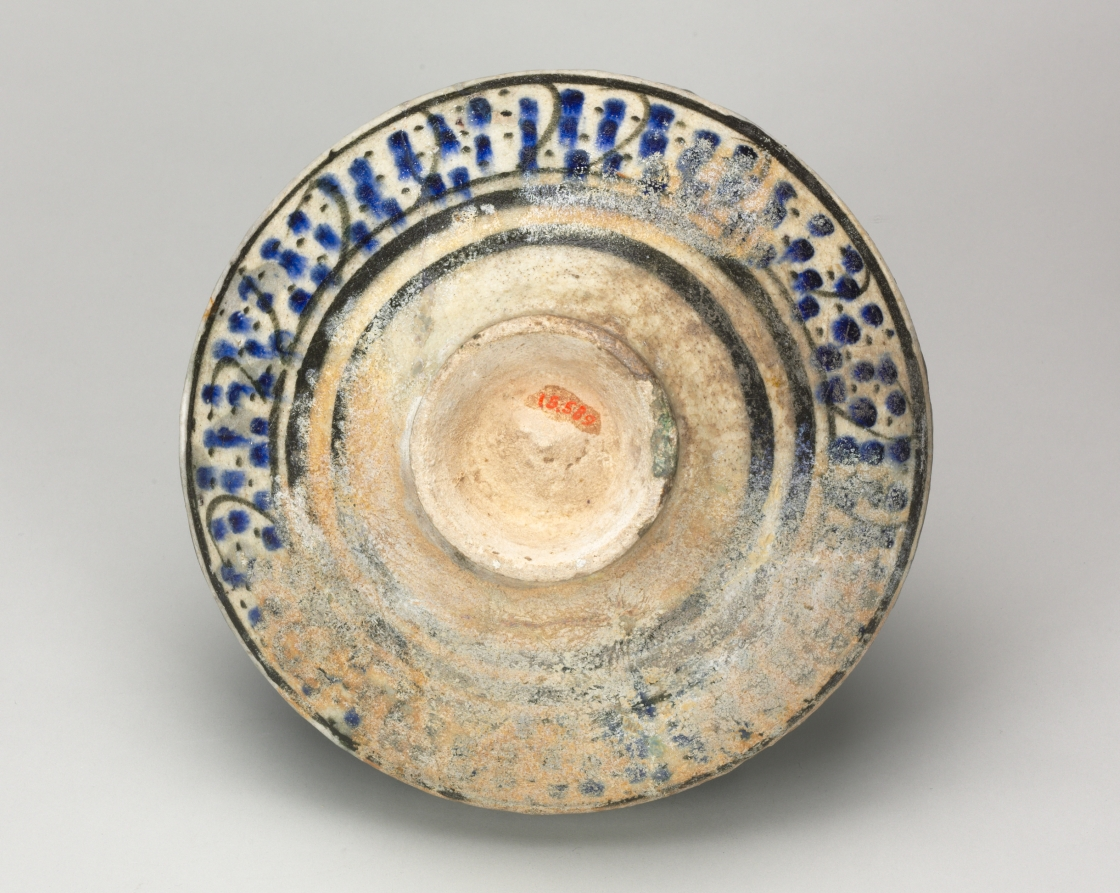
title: Bowl with Flying Birds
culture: Iran, probably Kashan, Ilkhanid period (1256–1353)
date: 1280–1400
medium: Fritware with underglaze-painted design, Sultanabad ware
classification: Ceramic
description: During the Ilkhanid period, decorative motifs from China were adopted into Persian art, including dragons, phoenixes, and lotus blossoms, which are seen on this bowl. Lotus blossoms were easily integrated into the existing tradition of floral and vegetal elements in Islamic art, while the phoenix was equated with the simurgh, a mythical bird known from the epic Persian poem the Shahnameh, or Book of Kings. The white slip designs on a gray background are typical of these wares, while the flat rim is influenced by Chinese vessels. This type of pottery was widely exported, and possibly imitated, as it has been found in excavations from Central Asia to Egypt.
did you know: This bowl was made after the Mongol conquest of Iran in the 13th century.